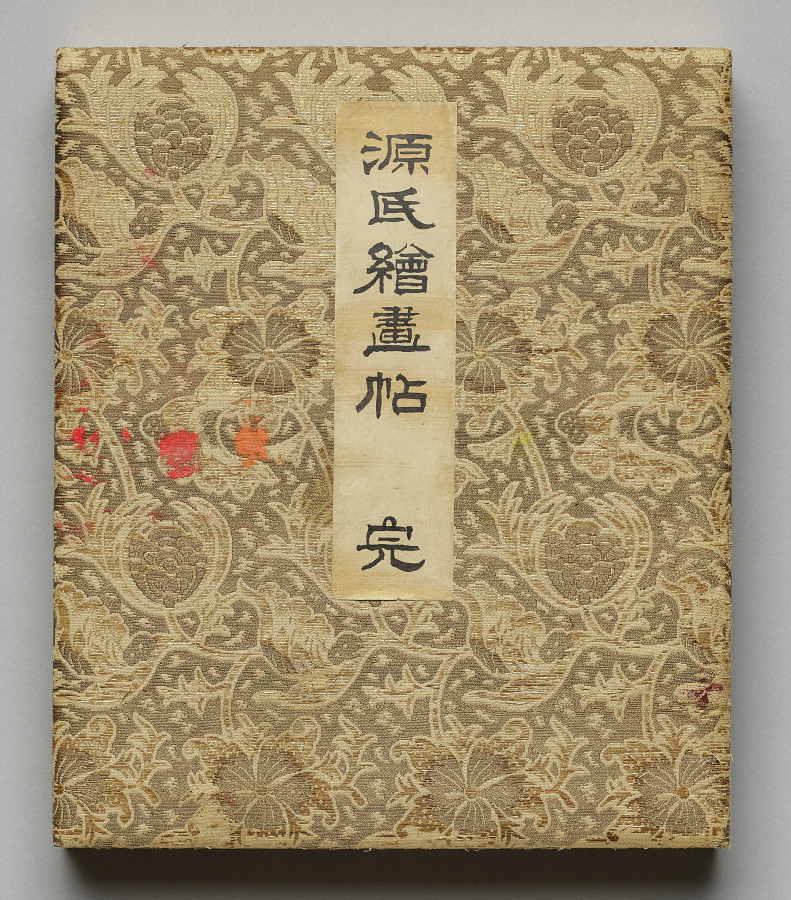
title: Album of Illustrations for the Tale of Genji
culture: Japan, Edo period (1615–1868)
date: 1600s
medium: Double-sided accordion-style album of 17 leaves; ink, light color, and gold on paper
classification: Bound Volume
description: This album contains illustrations for the classic literary work the Tale of Genji, authored in the 1000s by Murasaki Shikibu, an aristocrat of the Heian period (794–1185) court. The scenes are painted in the “white drawing” (hakubyō) mode, in which a fine ink line is used to depict figures and spaces with great subtlety, punctuated only occasionally by traces of red pigment for a character’s lips, a detail of a garment, or a decorative element. These two scenes illustrate episodes from the chapters “Thin Veil of Cloud” (Usugumo) and “Barrier Gate” (Sekiya).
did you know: The illustrations are identified by chapter title in cartouches to the upper right of the paintings.